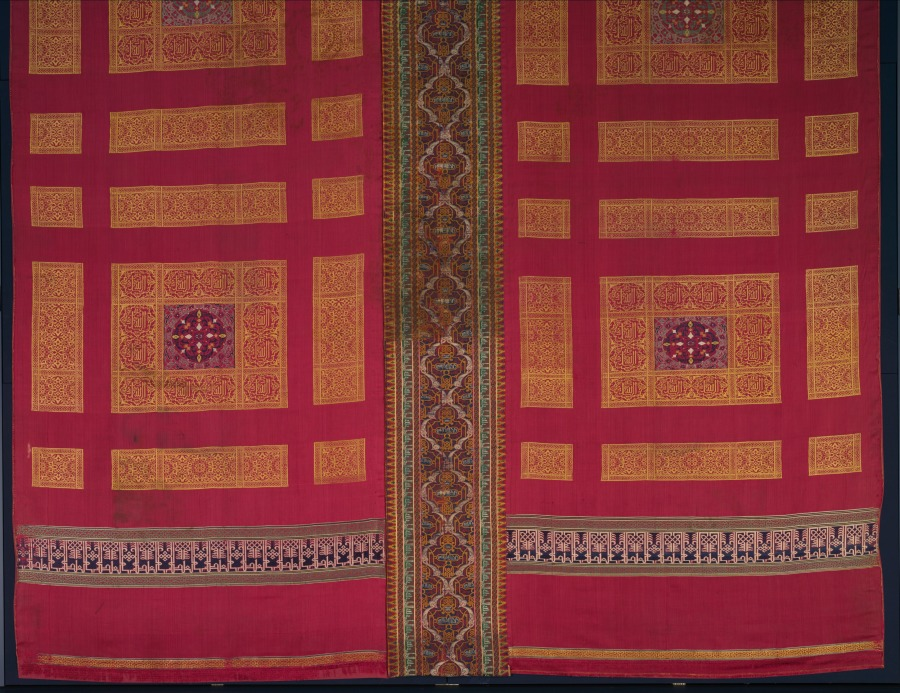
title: Silk curtain from the Alhambra palace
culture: Spain, Granada, Nasrid period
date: 1300s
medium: lampas and taqueté: silk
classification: Textile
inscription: the bold knotted Kufic inscription in the top and bottom borders of the side panels repeats the Arabic word "felicity." Within the arches forming a frieze in the top border is a Kufic inscription "good fortune" and a Naskhi inscription repeating trhe motto of the Nasrid dynasty, "There is no conqueror but God." In the borders of the three large ornamental rectangles on each side panel is the Naskhi inscription "Dominion belongs to God alone." On the central panel the inscriptions in the borders repeat the phrase, "Majestry is God's," while the Nasrid motto, "There is no conqueror but God" and, above, "Blessing," are inscribed in the arabesque ogives.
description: This is one of two of the largest, most complete, and most ornate curtains to survive from the 1300s when it presumably hung in the royal Alhambra Palace in Granada, the last Muslim stronghold in Spain. Its style, artistic vocabulary, and harmonious proportions reflect the magnificent wall decoration in the Alhambra. The motto of the ruling Nasrid dynasty, "There is no conqueror but God," is inscribed in the end borders and central panel. The inscribed striped silk forming the central panel is more worn, suggesting that it was recycled, most likely during the 1300s.